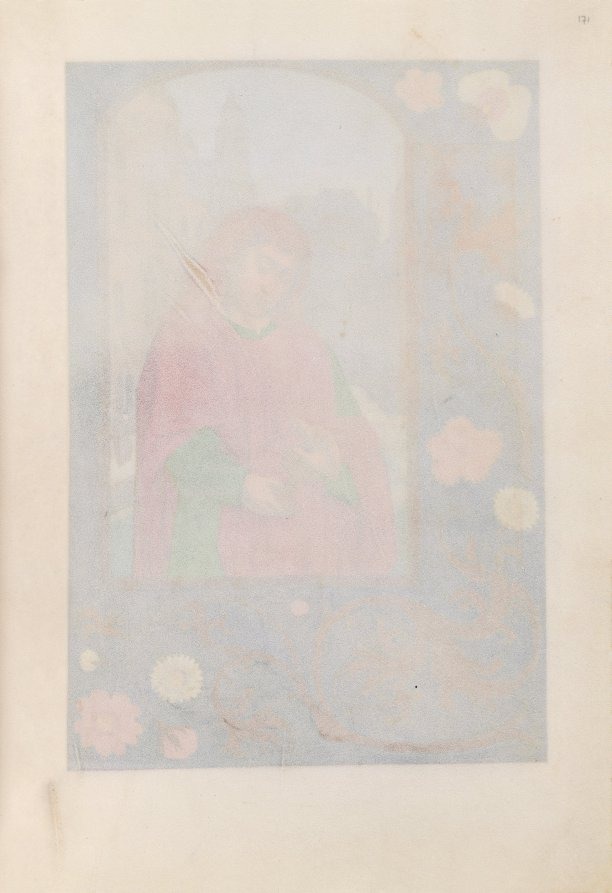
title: Hours of Queen Isabella the Catholic, Queen of Spain: Fol. 171r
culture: Flanders, Ghent and Bruges, late 15th century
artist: Master of the First Prayerbook of Maximillian (Flemish, c. 1444–1519)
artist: and Associates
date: c. 1500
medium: ink, tempera, and gold on vellum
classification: Bound Volume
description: This manuscript was illuminated by a circle of at least five highly organized manuscript painters active in the Flemish cities of Ghent and Bruges. The principal illuminator was Alexander Bening, who painted the majority of the book's miniatures. Manuscripts produced by this circle of artists are renowned for the decoration of their borders, which typically feature a rich variety of realistically-painted flowers, birds, and butterflies. This prayer book, called a book of hours, was intended not for a cleric, but for the private devotions of a lay person-in this case, Isabella the Catholic, Queen of Spain (1451-1504). Isabella's coat of arms embellishes the book's frontispiece. It is unlikely that the book was commissioned by the Queen herself; rather, she probably received it as a diplomatic gift from someone courting her patronage, perhaps Cardinal Francisco Jimenez de Cisneros. A Franciscan friar, Jimenez was dependent upon Isabella for his advancement, first to the post of Queen's confessor in 1492, and then to Archbishop of Toledo in 1495.